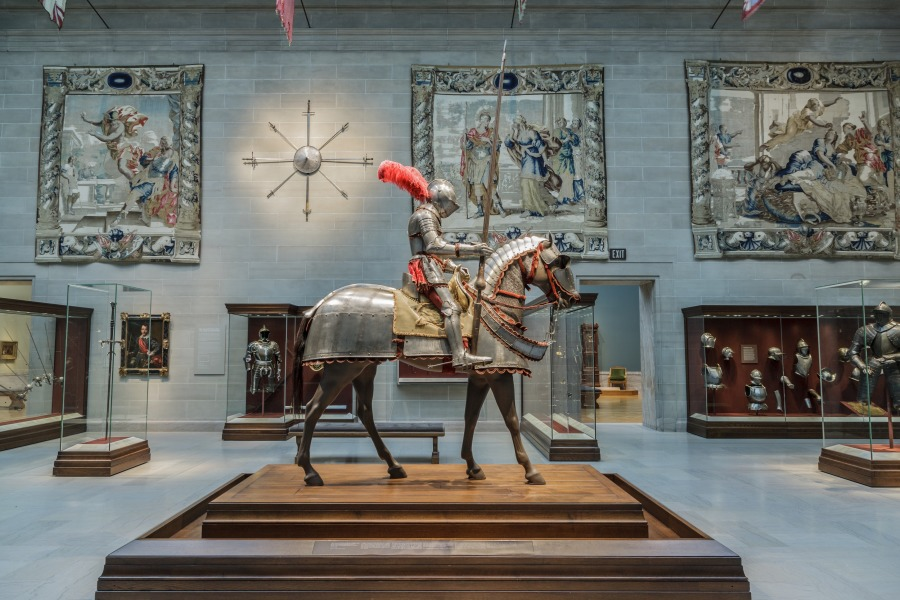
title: Armor for Man and Horse with Völs-Colonna Arms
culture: North Italy, 16th century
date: c. 1575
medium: steel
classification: Arms and Armor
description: A knight depended on his horse both as a weapon and a means of defense. He therefore had to take great care to protect his charger. From the 1100s on, knights first covered their steeds in trappings of fabric and later of mail. By around 1400, full steel plate armor for horses was complete. It is possible that this armor made for both man and horse originally belonged to a "garniture," an armor with multiple customized exchange elements that could convert the basic suit to various field and sporting uses. With different pieces of the garniture attached, this suit could have been worn either in battle or in various tournament games. The total combined weight of both the man's and horse's armor is 114 pounds. The etched decoration of this armor is of a type that became fashionable in northern Italy during the late 1500s. It consists of ornamental bands of etched figures, animals, portrait busts, and armor trophies. In addition, a coat of arms is represented seven times in different places—the center of the breastplate and blackplate, the front and back of each pauldron (shoulder defense), and the center of the peytral (horse's breastplate). The coat of arms is that of the Colonna family quartered with another, still unidentified family. It probably belonged to an unknown member of the Völs-Colonna family from the South Tyrol, now part of northern Italy.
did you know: The Vols-Colonna family crest is found seven times in prominent locations on this armor set for horse and rider.